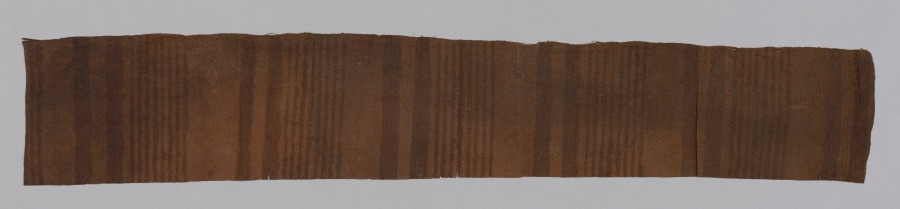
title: Tapa Cloth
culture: Oceania, Polynesia, Hawaii, 20th century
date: before 1930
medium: probably mulberry bark (Broussonetia papyrifera)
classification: Textile